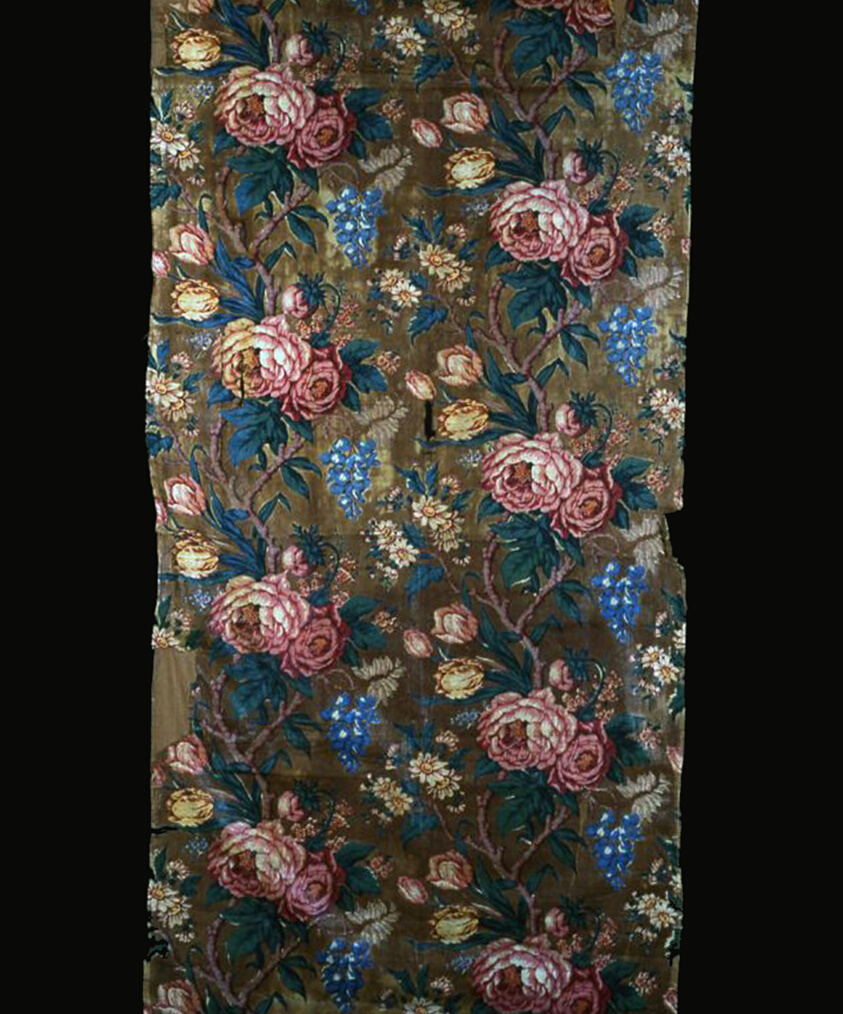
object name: Textile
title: Panel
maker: England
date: c. 1830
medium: Cotton, plain weave; block printed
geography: England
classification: textile; weaving - printed; weaving